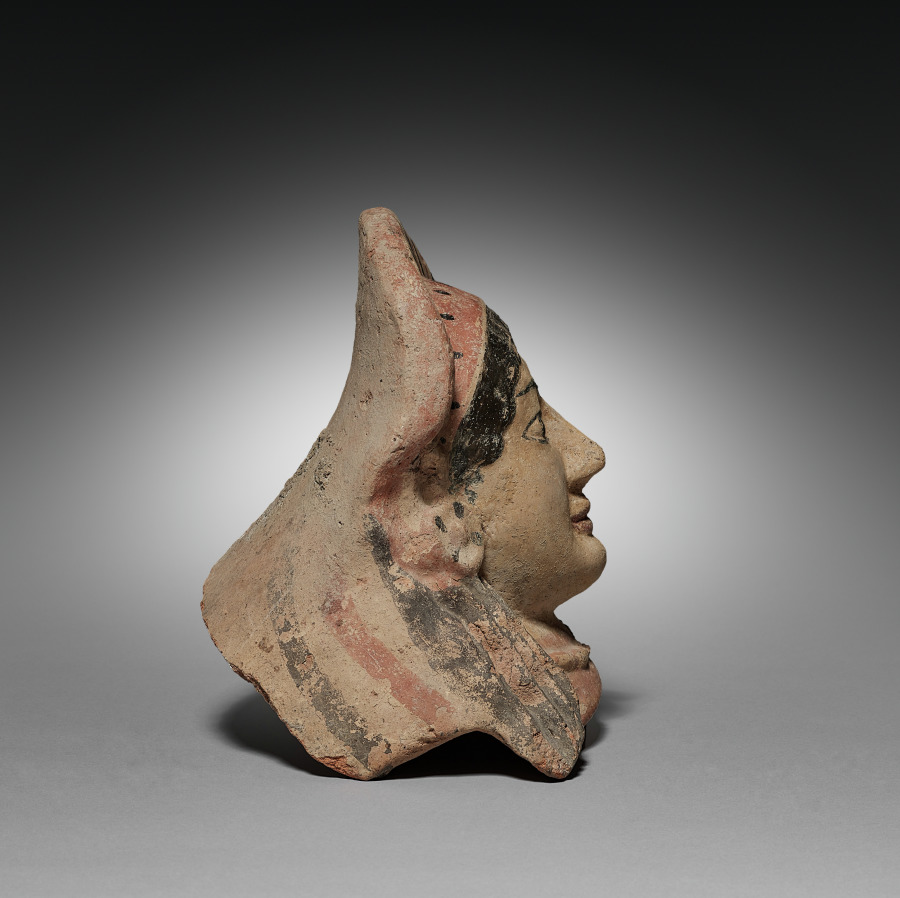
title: Antefix in the Form of a Maiden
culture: Etruscan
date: late 500s–early 400s BCE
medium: Painted terracotta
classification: Sculpture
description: Staring out with almond-shaped eyes and enigmatic smile, this brightly painted female head hides a rounded back made to serve an important function. She is a molded terracotta antefix, made to cap an open-ended roof tile along the sloping edge of a wooden building. Depending on the size of the structure it adorned, this antefix may have sat alongside dozens of others, likely all similar in form and painted decoration, and perhaps accompanied by additional polychrome architectural sculpture. Sometimes identified as maenads, the female followers of Dionysos (Etruscan Fufluns), such figures might also be nymphs or anonymous maidens.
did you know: Much Etruscan architectural sculpture was molded terracotta rather than carved stone.